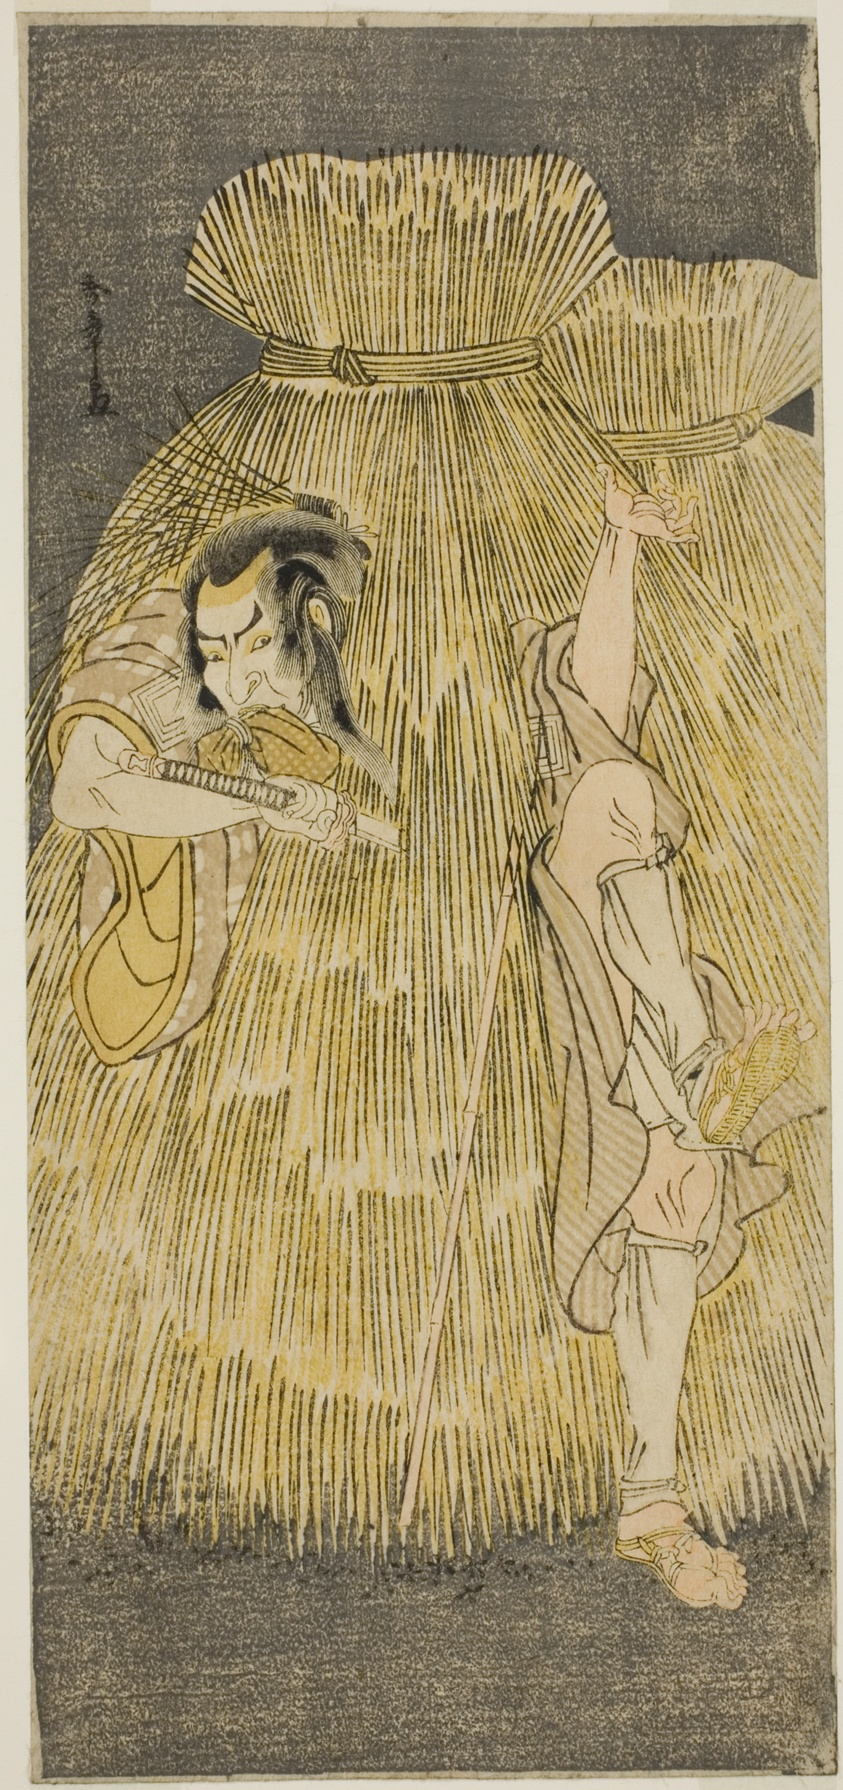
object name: Print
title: The Actor Ichikawa Danzo IV Doing a Quick Change Between the Roles of Sadakuro and Yoichibei, in the Play Kanadehon Chushingura, Performed at the Morita Theater in the Third Month, 1781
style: Japanese (culture or style)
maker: Katsukawa Shunsho 勝川 春章; Japanese, 1726-1792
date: c. 1781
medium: Color woodblock print; hosoban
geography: Japan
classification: woodblock print; print; asian art